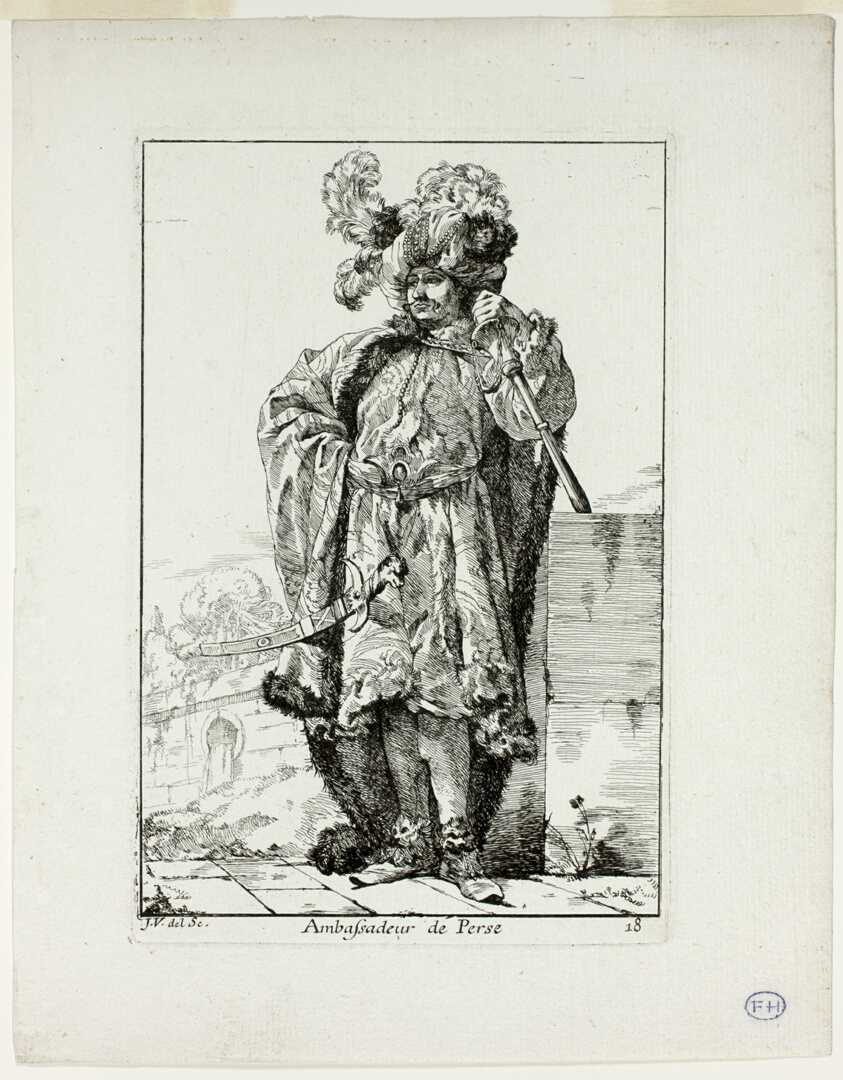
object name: Print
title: Ambassadeur de la Perse, plate eighteen from Caravanne du Sultan à la Mecque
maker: Joseph-Marie Vien, the elder; French, 1716–1809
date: 1748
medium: Etching on ivory laid paper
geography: France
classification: etching; paper; print; prints and drawing